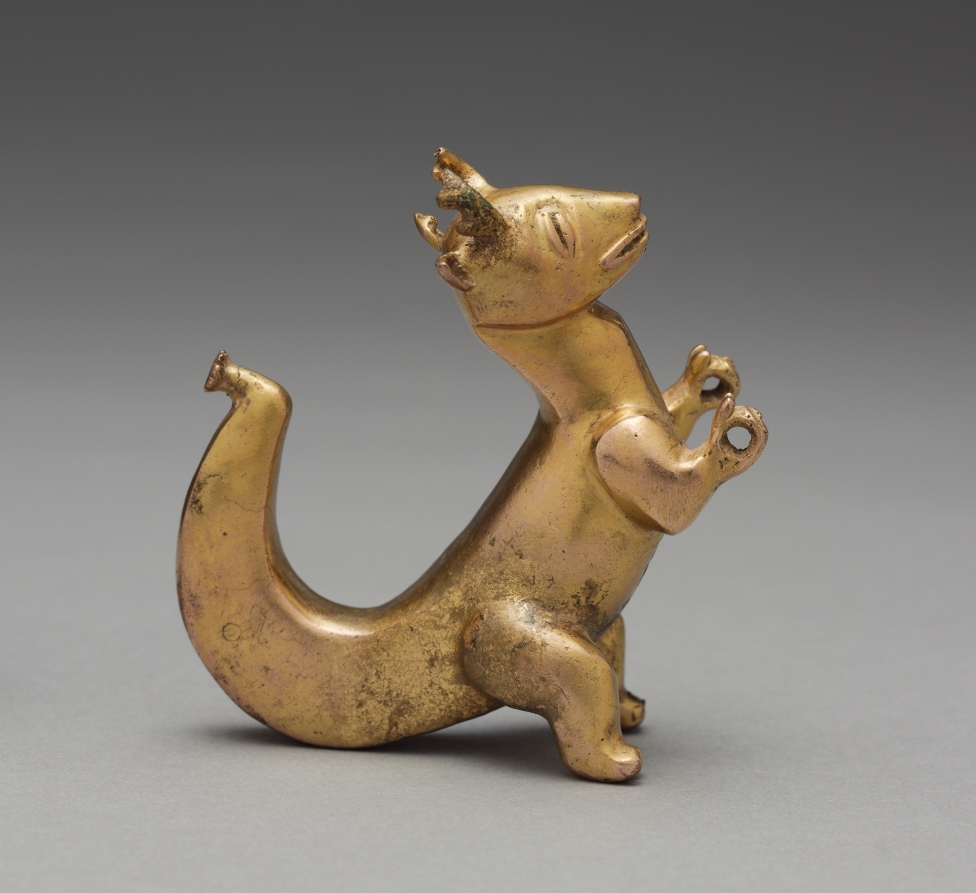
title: Pendant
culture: Panama, International style, 5th-7th century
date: 400–700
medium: cast gold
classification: Metalwork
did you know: Panning for gold was viewed as a sacred activity among the ancient inhabitants of Costa Rica and Panama.